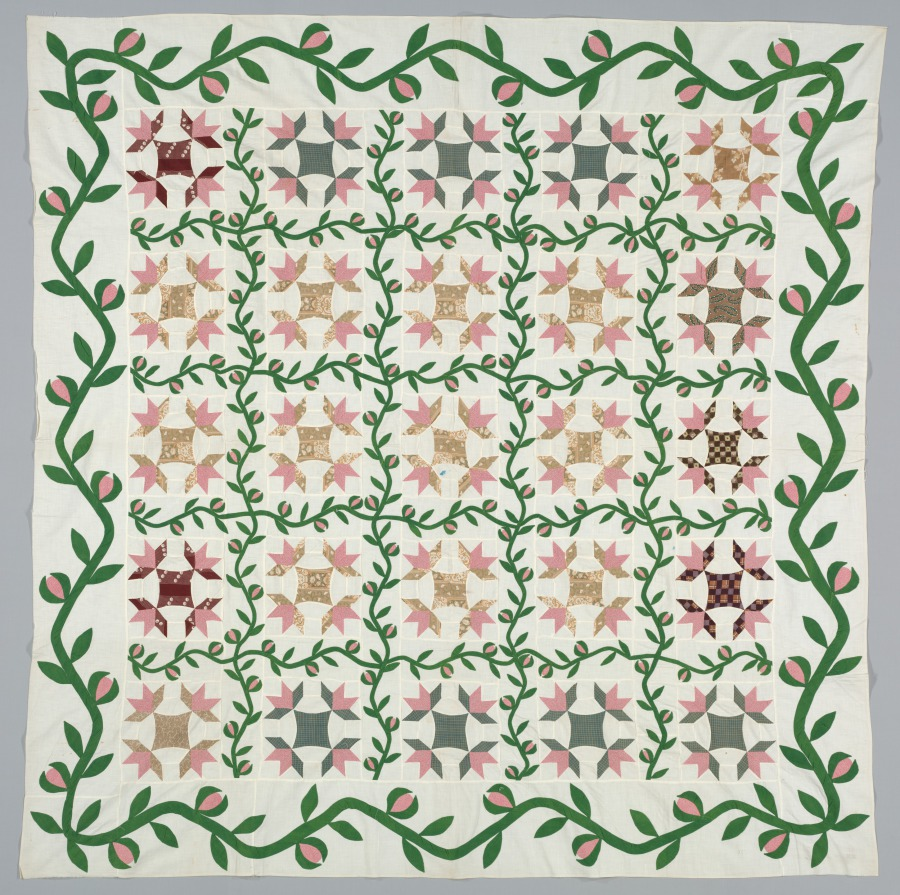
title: Quilt Cover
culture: America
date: c. 1857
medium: pieced cotton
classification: Textile